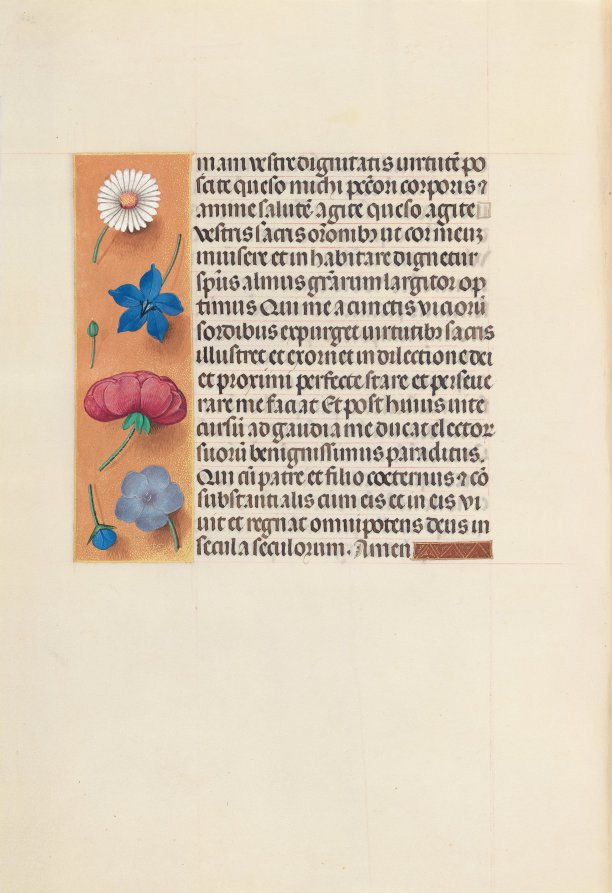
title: Hours of Queen Isabella the Catholic, Queen of Spain: Fol. 263v, Mass of St. Gregory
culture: Flanders, Ghent and Bruges, late 15th century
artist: Master of the First Prayerbook of Maximillian (Flemish, c. 1444–1519)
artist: and Associates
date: c. 1500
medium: ink, tempera, and gold on vellum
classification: Bound Volume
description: This manuscript was illuminated by a circle of at least five highly organized manuscript painters active in the Flemish cities of Ghent and Bruges. The principal illuminator was Alexander Bening, who painted the majority of the book's miniatures. Manuscripts produced by this circle of artists are renowned for the decoration of their borders, which typically feature a rich variety of realistically-painted flowers, birds, and butterflies. This prayer book, called a book of hours, was intended not for a cleric, but for the private devotions of a lay person-in this case, Isabella the Catholic, Queen of Spain (1451-1504). Isabella's coat of arms embellishes the book's frontispiece. It is unlikely that the book was commissioned by the Queen herself; rather, she probably received it as a diplomatic gift from someone courting her patronage, perhaps Cardinal Francisco Jimenez de Cisneros. A Franciscan friar, Jimenez was dependent upon Isabella for his advancement, first to the post of Queen's confessor in 1492, and then to Archbishop of Toledo in 1495.